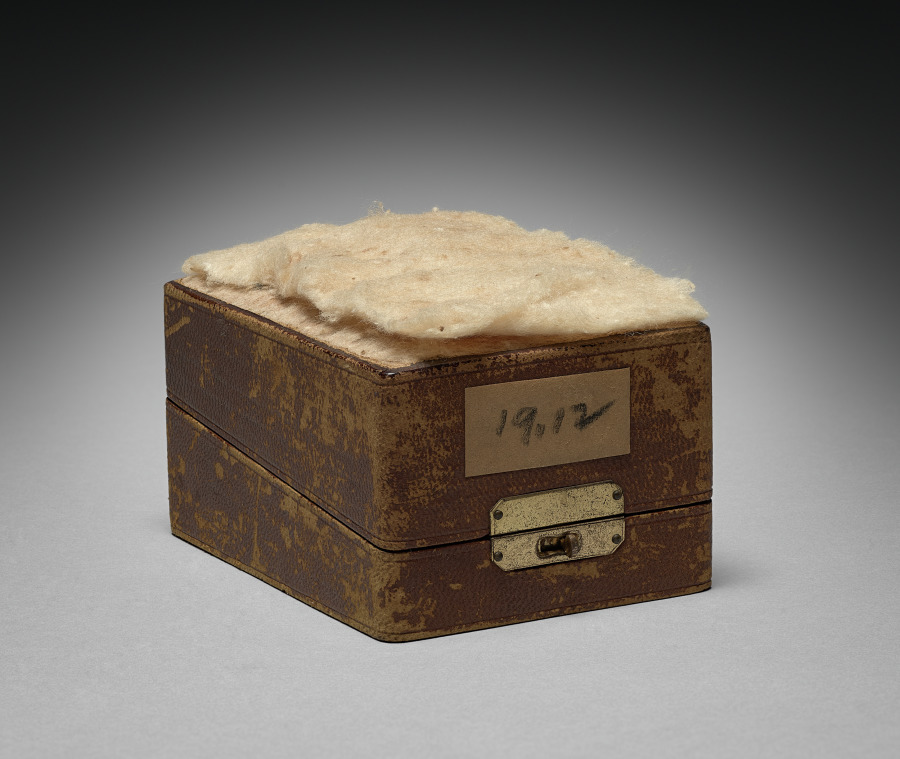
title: Amphoriskos (Small Amphora)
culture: Roman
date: 50–100 CE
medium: glass, mold-blown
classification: Glass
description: First blown in a mold, then supplied with separately made handles, this small vessel likely held perfumed oil, a valuable commodity. Originally violet in color, its surface is now partially marred by areas of buff and iridescent weathering. The finely ribbed body is quite elegant, however, and its extravagant modern box attests to its significant value for a modern owner (prior to 1919).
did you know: Although much smaller, glass amphoriskoi (“small amphorae”) are similar in form to ceramic transport amphorae.